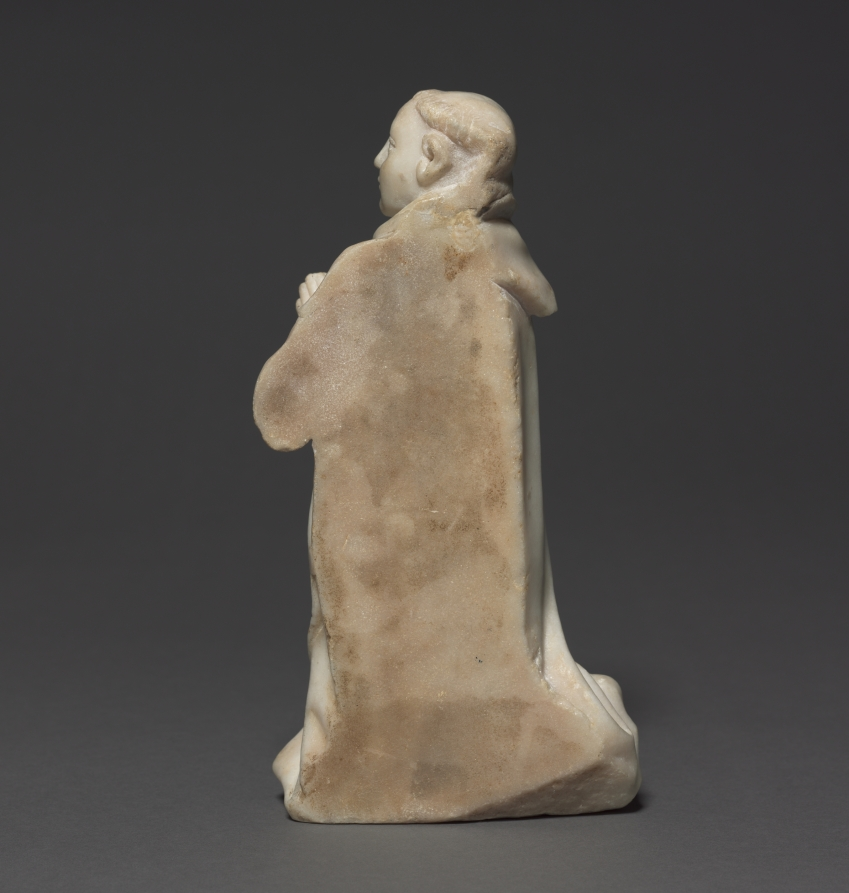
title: Kneeling Carthusian Monk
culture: France, Burgundy, Dijon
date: c. 1380–1400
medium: marble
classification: Sculpture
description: These are the only known surviving sculpted examples of kneeling Carthusian monks. Depictions of Carthusians in the same act of piety are found in paintings such as the one in this room from the Chartreuse de Champmol. These two figures are believed to come from the same Carthusian monastery as the mourners displayed nearby and would have formed part of a private devotional group, probably in a monk’s cell, with a sculpture of the crucified Christ or the Virgin positioned between them. They wear the recognizable white scapular, a hooded garment with front and back panels tied together with a tab.